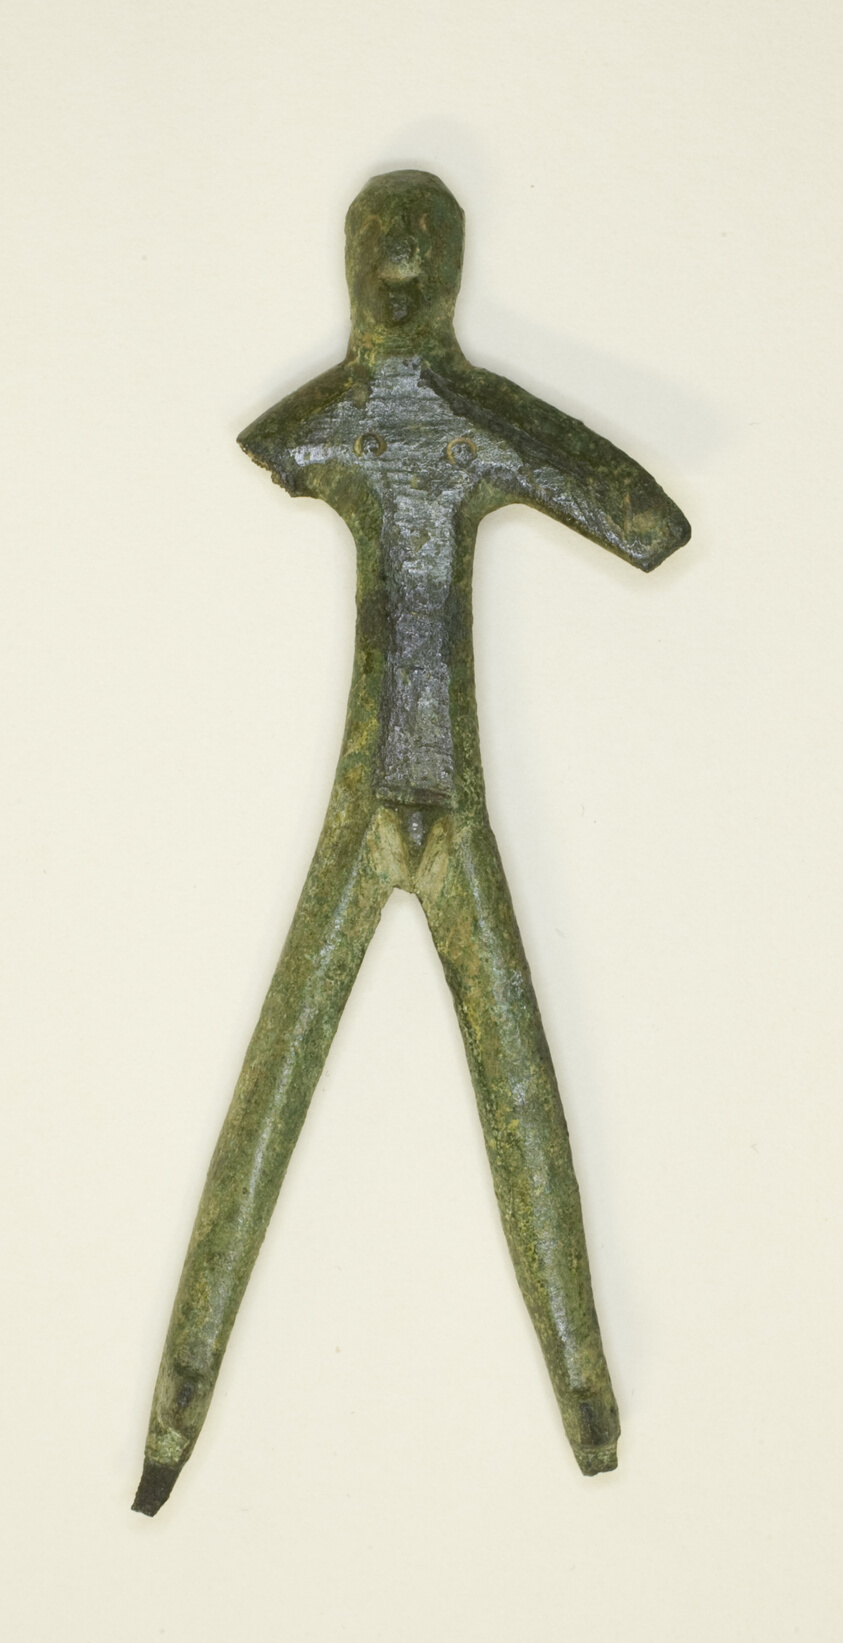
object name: Sculpture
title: Statuette of a Male Figure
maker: Italian; Umbria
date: 5th century BCE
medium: Bronze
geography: Umbria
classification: statuette; bronze; metal; sculpture; ancient art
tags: men